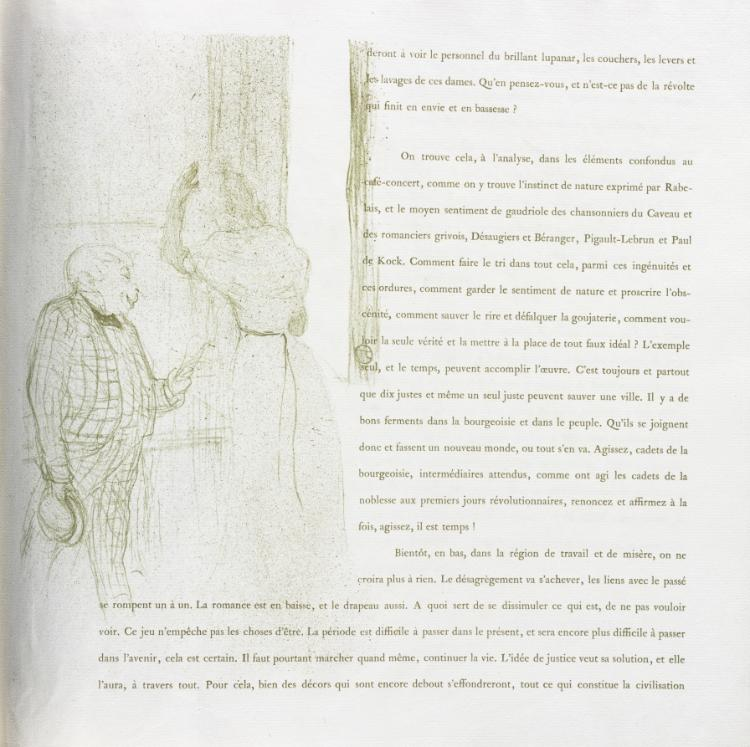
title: Yvette Guilbert-French Series: No. 15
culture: France, 19th century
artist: Henri de Toulouse-Lautrec (French, 1864–1901)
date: 1894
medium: lithograph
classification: Bound Volume